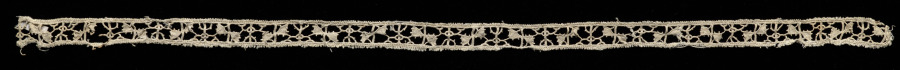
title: Lace Fragment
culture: Italy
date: 1500s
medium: Linen: needle lace (reticella) insertion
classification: Lace